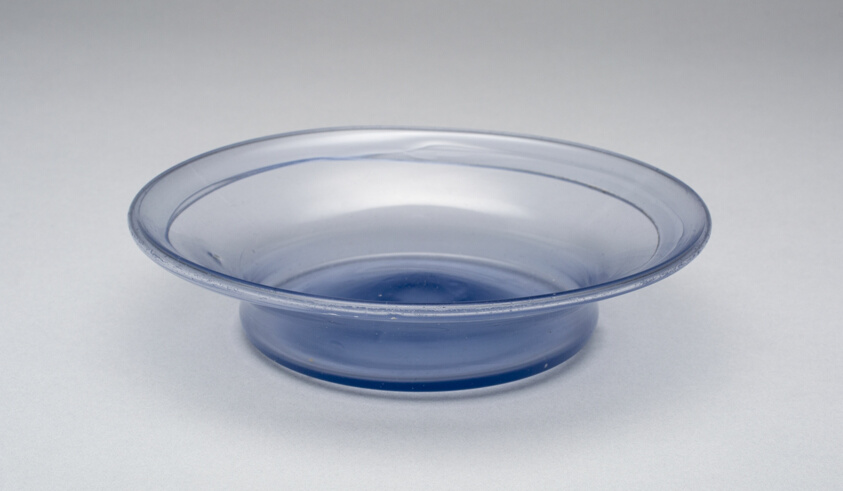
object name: Glass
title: Bowl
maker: Probably Mantua Glass Works; American, 1821–1829; Mantua, Ohio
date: c. 1825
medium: Blown glass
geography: Ohio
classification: bowl; glass; american decorative arts; american arts; decorative arts